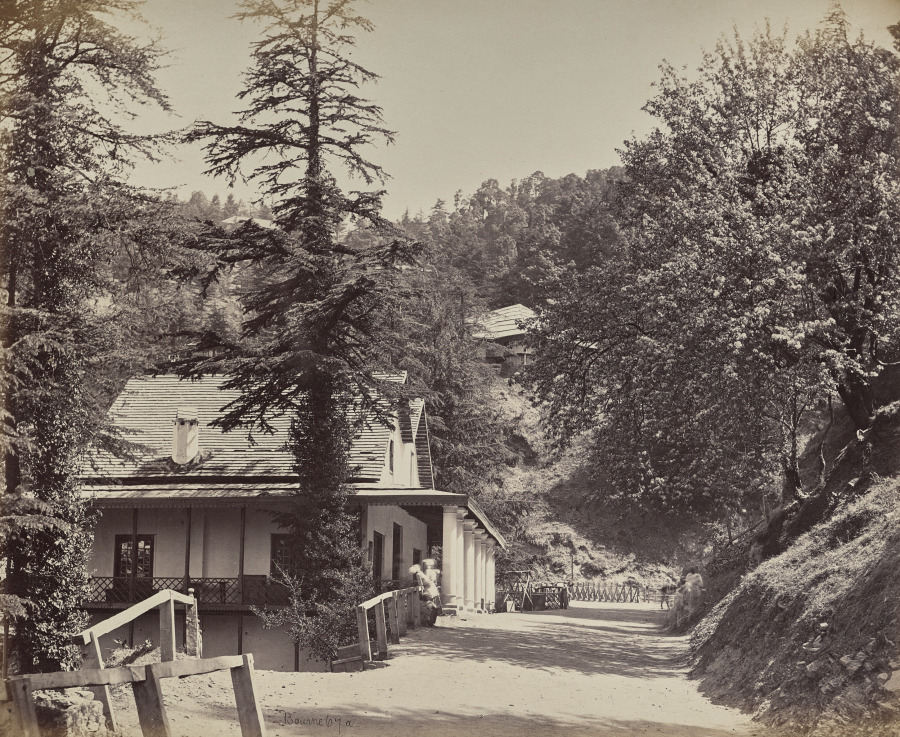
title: Simla. The Mall near Combermere Bridge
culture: England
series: Photographs of Northern India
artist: Samuel Bourne (British, 1834–1912)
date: 1863–70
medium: albumen print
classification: Photograph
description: The 50 images in this album, all taken in the 1860s, move from the hill towns of the Himalayas down to cities including Lahore (now in Pakistan), Delhi, Lucknow, Agra, Benares (now Varansi), and Calcutta (now Kolkata). Architectural studies of major monuments offer valuable historical records of what sites such as the Taj Mahal and the imperial mosque of the Mughal emperors in Delhi looked like before 20th-century restorations.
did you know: Samuel Bourne, the author of most the images in this album, was a banker in England before he moved to India to become a professional photographer.